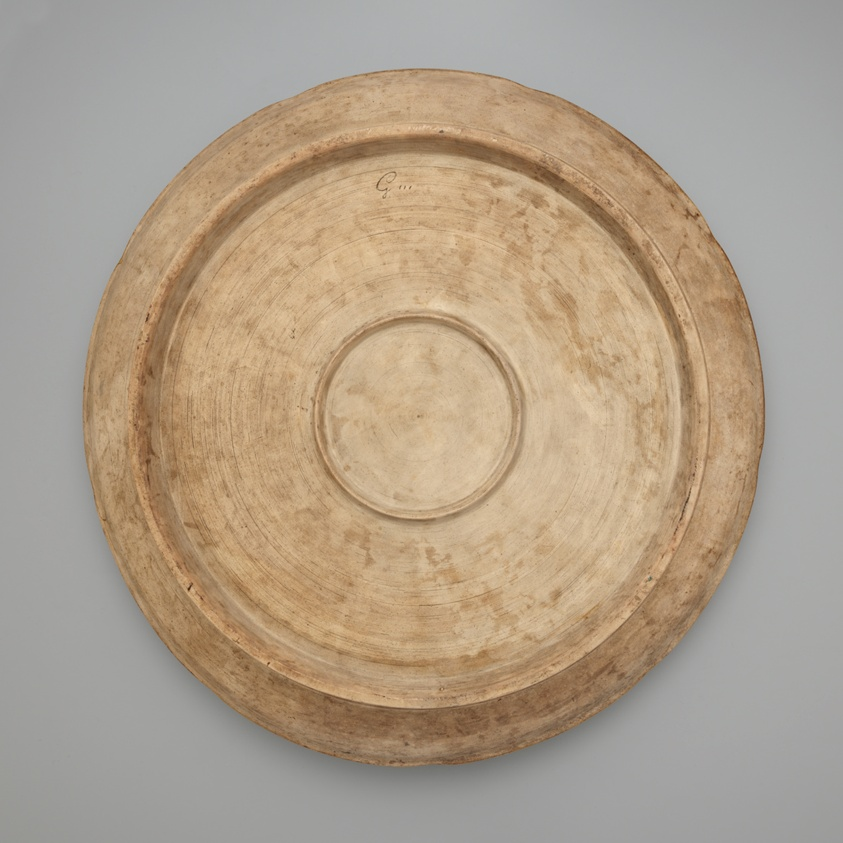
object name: Ceramics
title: Platter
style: japonism, 19th century, france, Impressionism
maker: Designed by Félix Bracquemond (French, 1833–1914); Made by Haviland & Co., Auteuil Studio, Paris (French, 1872-1886)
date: c. 1874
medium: Glazed earthenware and gilding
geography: Paris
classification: ceramics; dish (vessel); plate (general, dish)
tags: plates, impressionist, ceramics, mountain, waterfalls